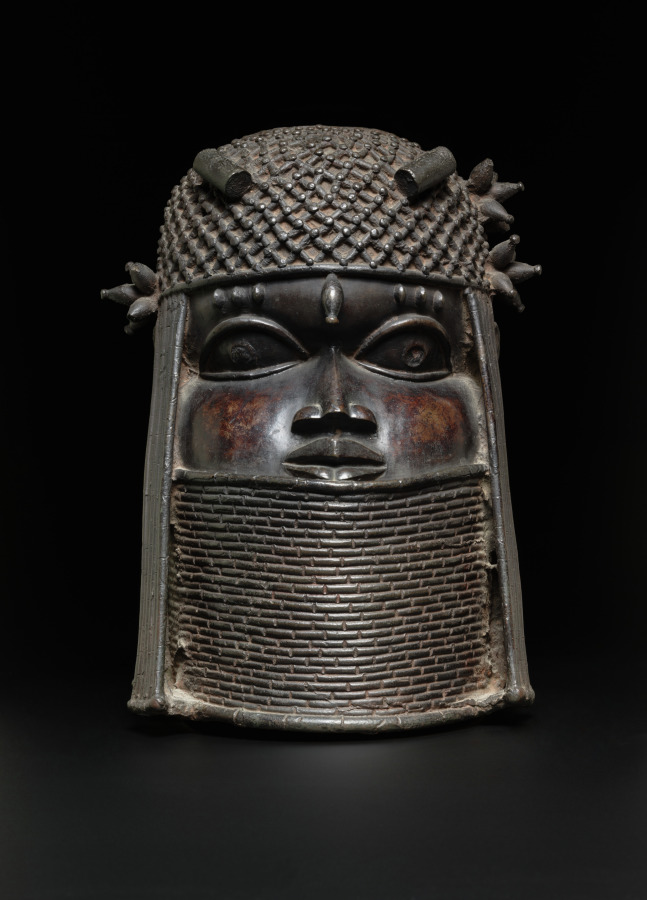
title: Ancestral Commemorative Head (uhunmwun-elao)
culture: Nigeria, Benin Kingdom, Ẹdo peoples, members of the Igun Eronmwon (royal brasscasters) guild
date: possibly mid-1500s or early 1600s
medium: Copper alloy and iron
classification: Sculpture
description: Brass heads are among many objects a new Ọba commissions when dedicating a shrine to their predecessor. This head of an Ọba wears layered necklaces of royal coral beads. Tubular beads adorn both the netted cap and slender braids alongside his temples. While representing an individual, his facial features and calm expression are idealized. The thickly cast head once supported a tusk. Immune to corrosion, brass symbolizes royal permanence. A personal religious object, this head sat on an ancestral altar in the Ọba’s palace. Like many works taken from Benin altars, this contrasts with its present-day public display in an American museum.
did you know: The obas (kings) of the Benin Kingdom still wear coral headpieces and jewelry like this sculpted head depicts.